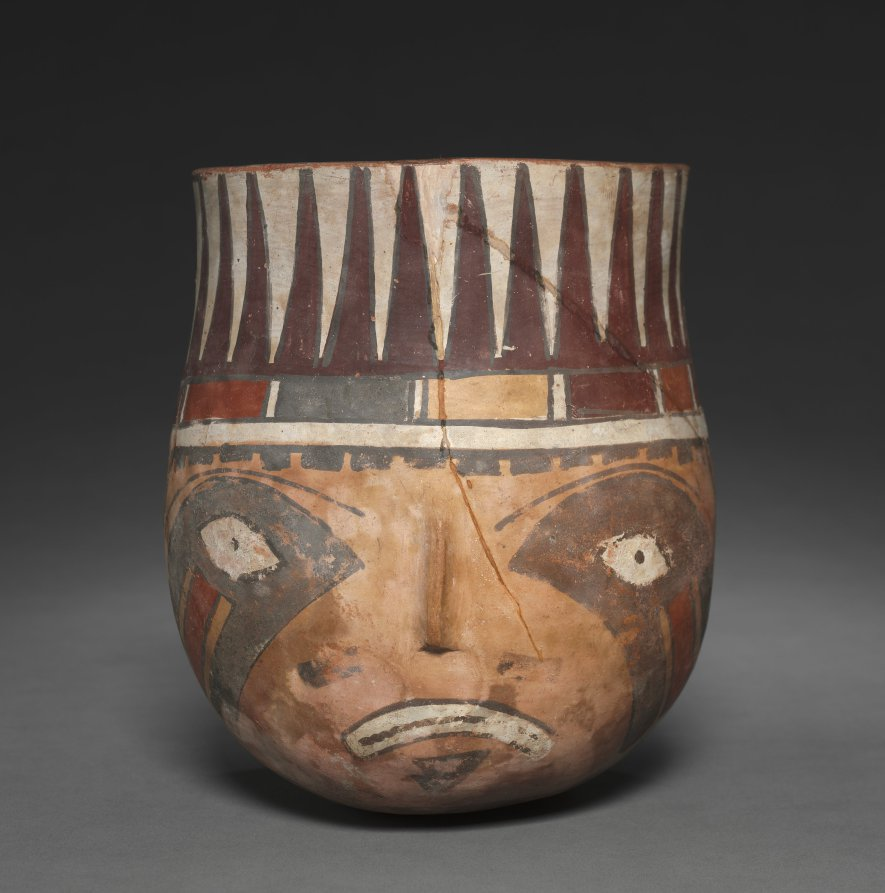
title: Vase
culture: Peru, South Coast, Nasca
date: c. 300–500 CE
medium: pottery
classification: Ceramic